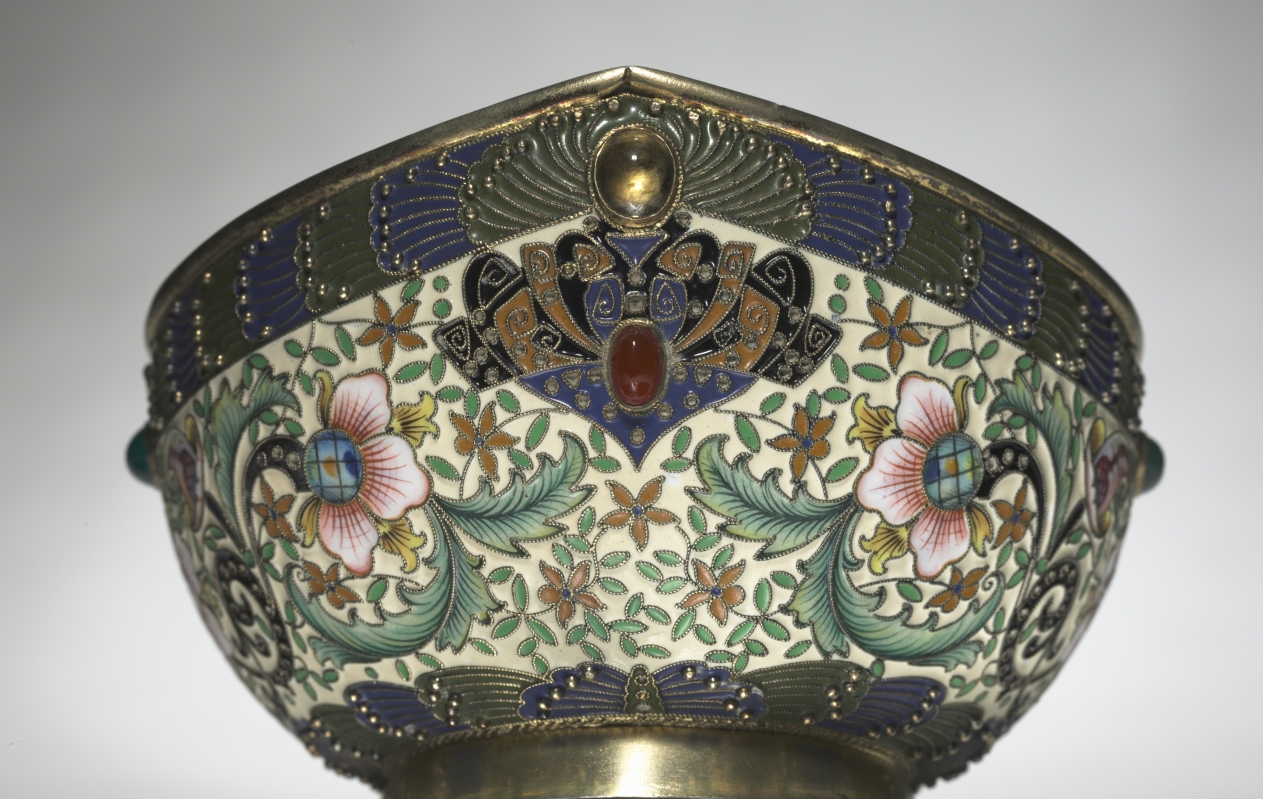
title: Kovsh (Cup)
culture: Russia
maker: House of Fabergé (Russian, 1842–1918)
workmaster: Feodor Ivanovich Rückert (Russian, 1840–1917)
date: 1896–1906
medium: silver gilt, enamel, cabochon gems, chrysoprases, carnelians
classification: Miscellaneous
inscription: inscribed on bottom: "CH" in script monogram (owner's initials).